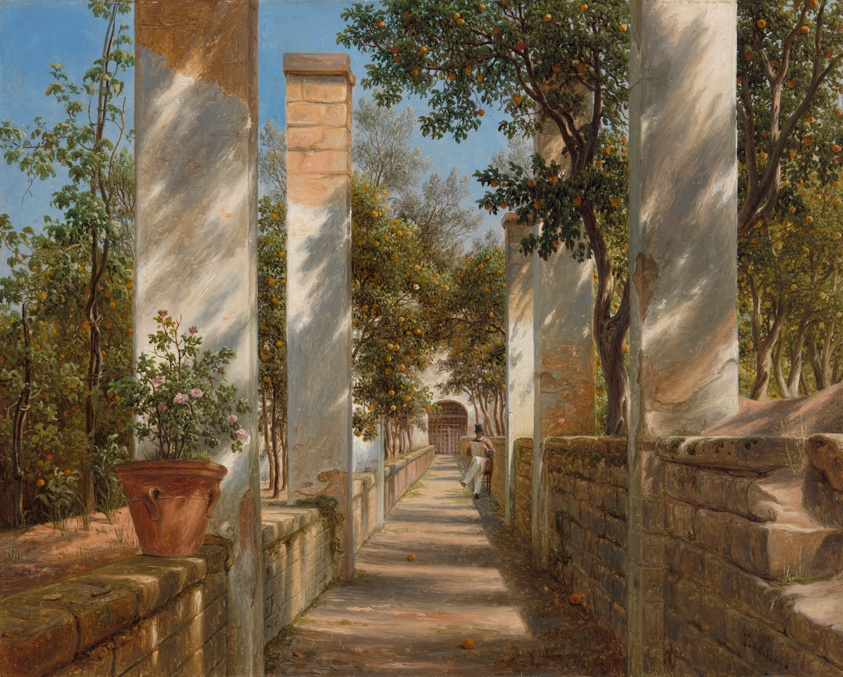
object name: Painting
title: Pergola with Oranges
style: nineteenth century, 19th century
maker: Thomas Fearnley (Norwegian, 1802–1842)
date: c. 1834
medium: Oil on paper, mounted on canvas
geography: Norway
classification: oil on paper; european painting; oil paintings (visual works); paint; painting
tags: oranges, exterior, farming, flowers, fruit, leisure, man, nature, plants, reading, summer, trees, wall